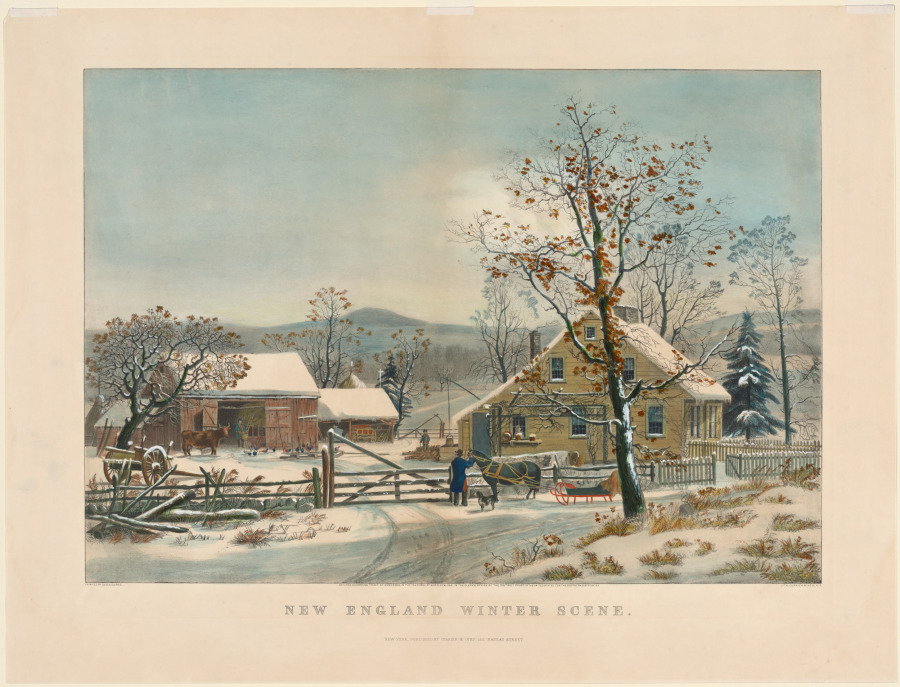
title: New England Winter Scene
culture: America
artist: and James Merritt Ives (American, 1824–1895)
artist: Nathaniel Currier (American, 1813–1888)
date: 1861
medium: lithograph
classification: Print